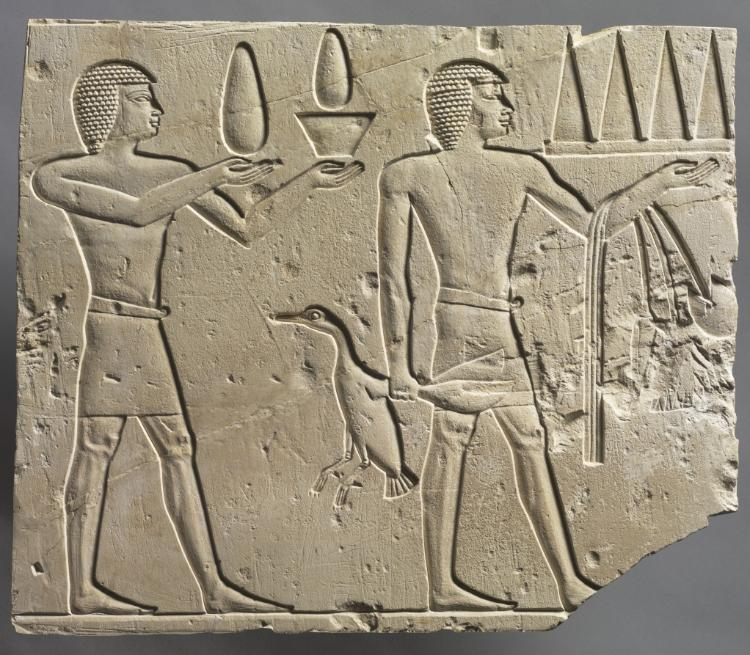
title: Two Offering Bearers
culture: Egypt, Late period (715–332 BCE), Dynasties 25–26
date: c. 667–647 BCE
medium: limestone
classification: Sculpture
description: Priests of unspecified rank bring different types of bread, a duck, and lotus flowers to the tomb. Sunken relief in the style of the later Old Kingdom.